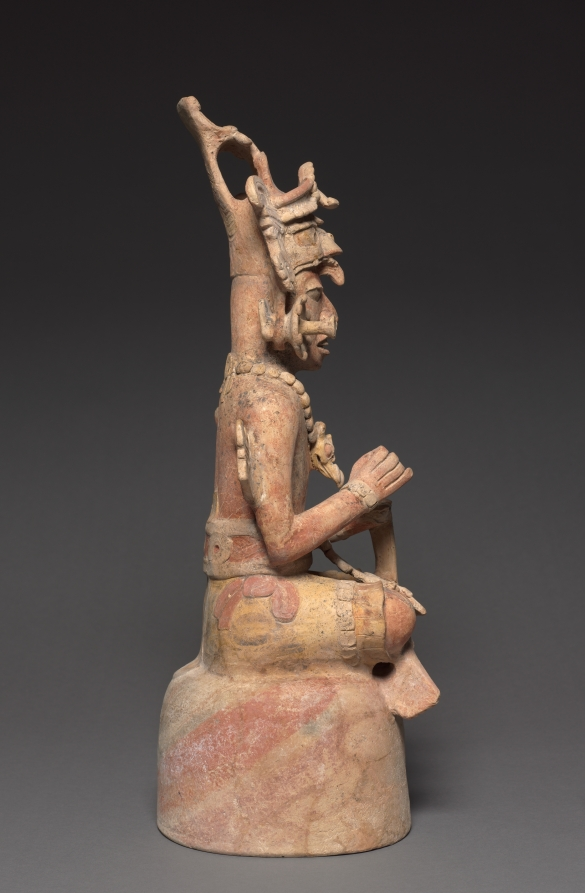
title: Artisan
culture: Guatemala, Petén region, Maya style (250-900), Maya style (250-900)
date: 250–600 CE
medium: earthenware with colored slips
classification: Sculpture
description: These figures represent the supernatural patrons of the visual arts and writing: the brothers Hun Batz and Hun Chuen ("One Monkey" and "One Artisan"). The two were refined artists but also bullies who tormented their younger brothers, who took revenge by transforming their elders into monkeys. Many Maya representations of the painter-scribes immortalize this fate by depicting the pair with both simian and human features, as here. The brothers are shown engaged in artistic or scribal pursuits. Sitting on high-domed bases that may have served as the lids of incense or offering bowls, each apparently once grasped a tool in his upper hand—for instance, a paint brush or a stylus for writing. In the lower hand, one cradles a small mask and the other, a piece of bark that likely refers to the beaten bark from which the Maya made books.